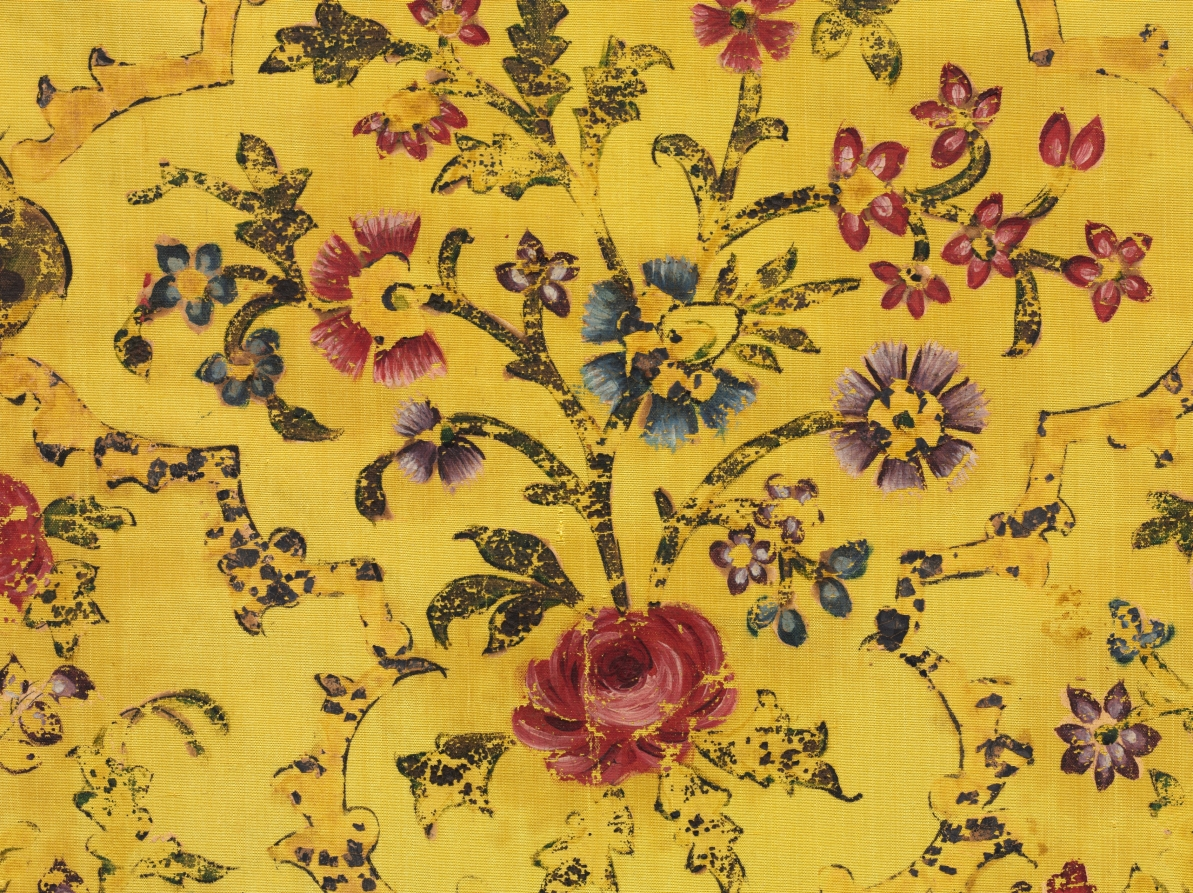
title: Wall cover with flora, peacocks, and portrait medallions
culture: Iran, Qajar period (1779-1925)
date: 1800s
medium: taffeta, hand-painted, block-printed: silk and pigments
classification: Textile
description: The European fashion of installing Chinese export silks with painted decoration as luxurious wall coverings may have inspired this exceptional Iranian silk. European engravings, which had flooded the Iranian market by the 19th century, most likely inspired the pattern. This rare silk fabric with painted figural and foliate decoration may have been a luxurious wall covering in a palace or grand mansion in the city of Kashan where mural paintings display similar 19th-century designs. Glistening silver pigment originally formed the palmette-leaf compartment outlines (now mostly deep yellow) that display colorful blossoming plants enlivened with now tarnished silver peacocks. At their junctures, portrait medallions of Iranian princesses are distinctly Qajar in attire and style, as are the composite blossoming plants.